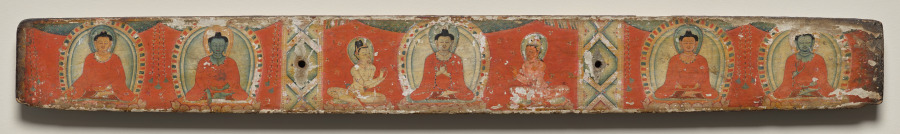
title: Ratnasambhava, Akshobhya, Vairochana with attendants, Amitabha, and Amoghasiddhi, Top cover, from a Manuscript of the Perfection of Wisdom in Eight Thousand Lines (Ashtasahasrika Prajnaparamita-sutra)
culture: Eastern India, Bihar, Vikramashila Monastery. Paintings: Nepal, Kathmandu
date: Sunday, September 14, 1119 (year 239 of the Newar Samvat in the month of Ashvina)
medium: Covers: Gum tempera, colors, and paper on wood; pages: gum tempera and ink on palm leaves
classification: Painting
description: The inner side of the top cover is fully painted with images of the Five Cosmic Buddhas of Esoteric Buddhism. Each one has a different color, meaningful hand gesture, and is associated with a spatial direction. In the center is the white Vairochana holding his hands in the enlightenment mudra. On either side of the binding holes are the other four Cosmic Buddhas Akshobyha (blue, earth-touching mudra, east) and Amitabha (red, meditation mudra, west), and on the ends are Ratnasambhava (gold, gift-giving mudra, south) and Amoghasiddhi (green, fear-not mudra, north). The top side is covered with ritual materials indicating that this book was once an object of worship.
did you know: The Five Tathagatas could be the source of visions that would help Buddhist practitioners on the path to enlightenment.